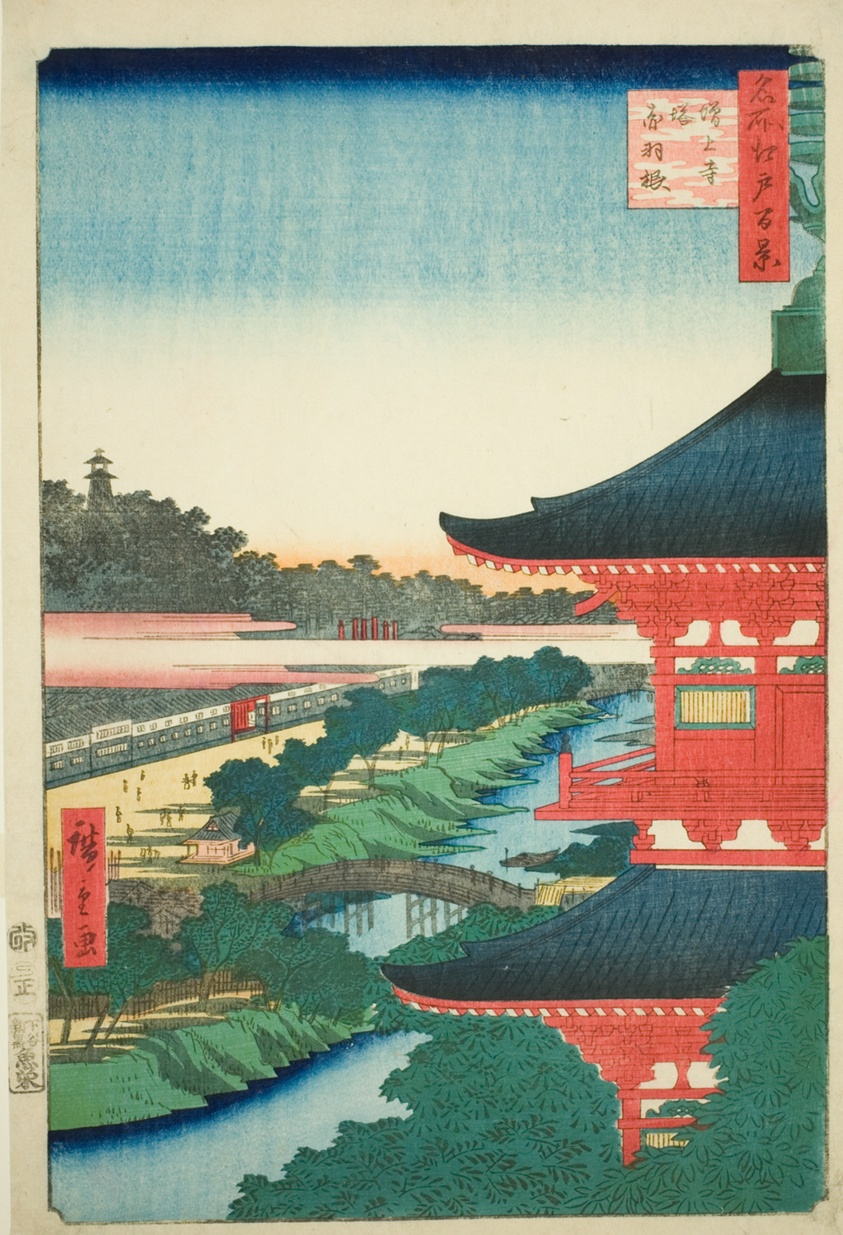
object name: Print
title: The Pagoda at Zojo Temple and Akabane (Zojoji to, Akabane), No.53 from the series “One Hundred Famous Views of Edo (Meisho Edo hyakkei)”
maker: Utagawa Hiroshige (Japanese, 1797-1858)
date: 1857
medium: Color woodblock print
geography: Japan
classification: woodblock print; print; asian art